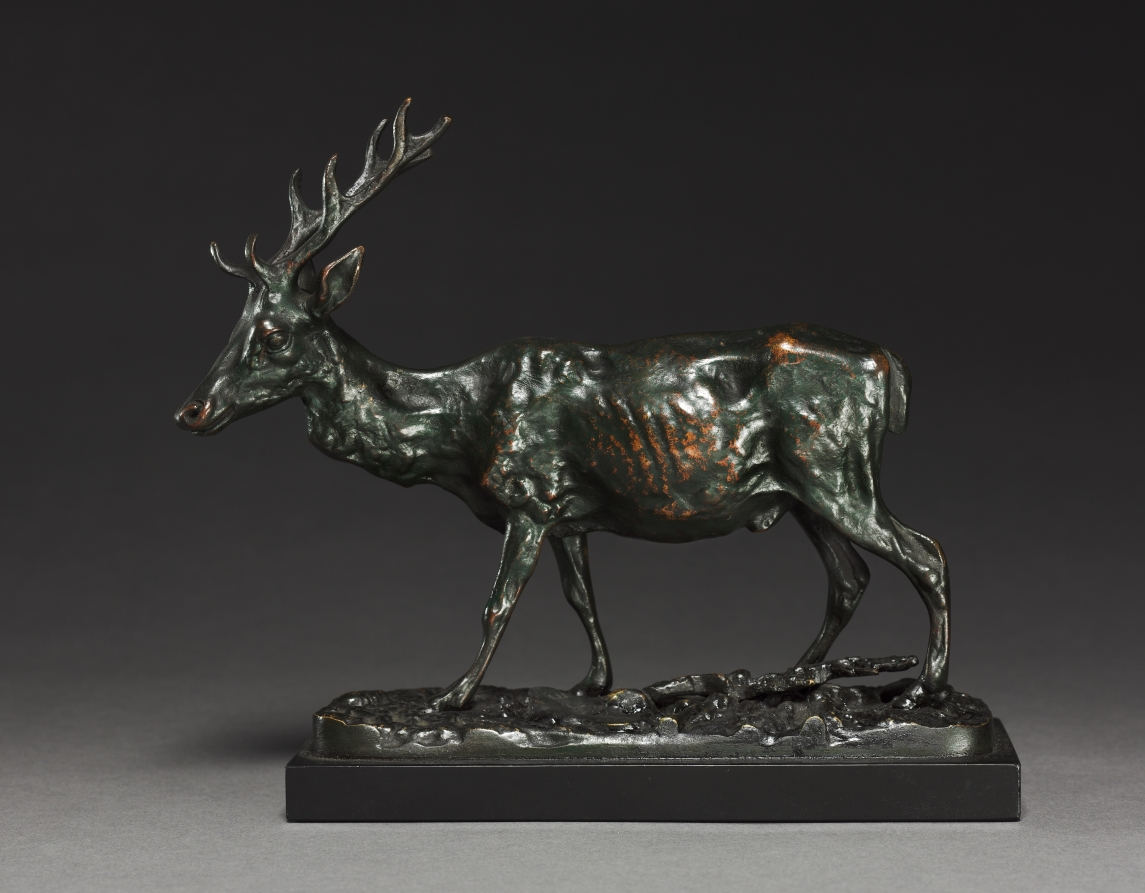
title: Deer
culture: France, 19th century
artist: imitator of Antoine-Louis Barye (French, 1796–1875)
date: after 1830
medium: bronze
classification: Sculpture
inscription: Signed: "Barye"